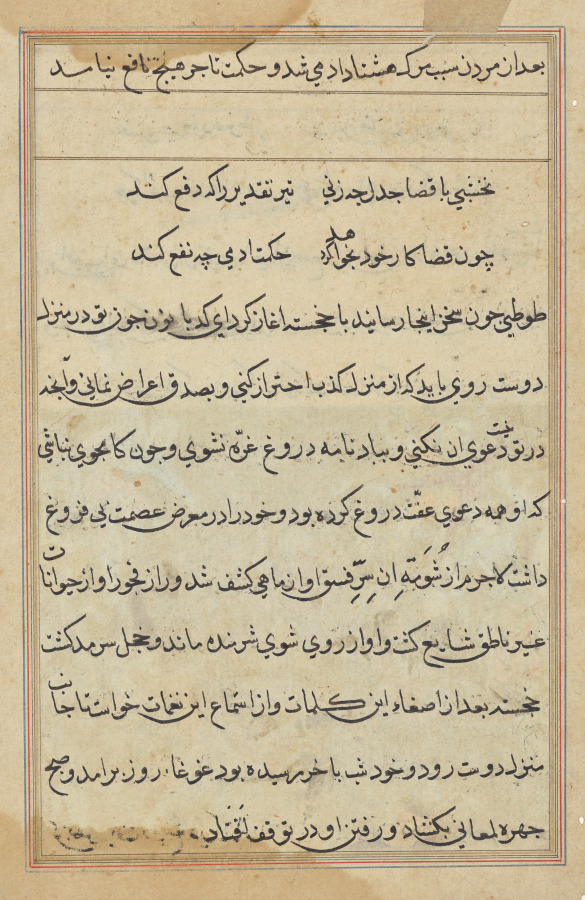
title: Page from Tales of a Parrot (Tuti-nama): text page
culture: Mughal India, court of Akbar (reigned 1556–1605)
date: c. 1560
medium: gum tempera, ink, and gold on paper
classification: Painting